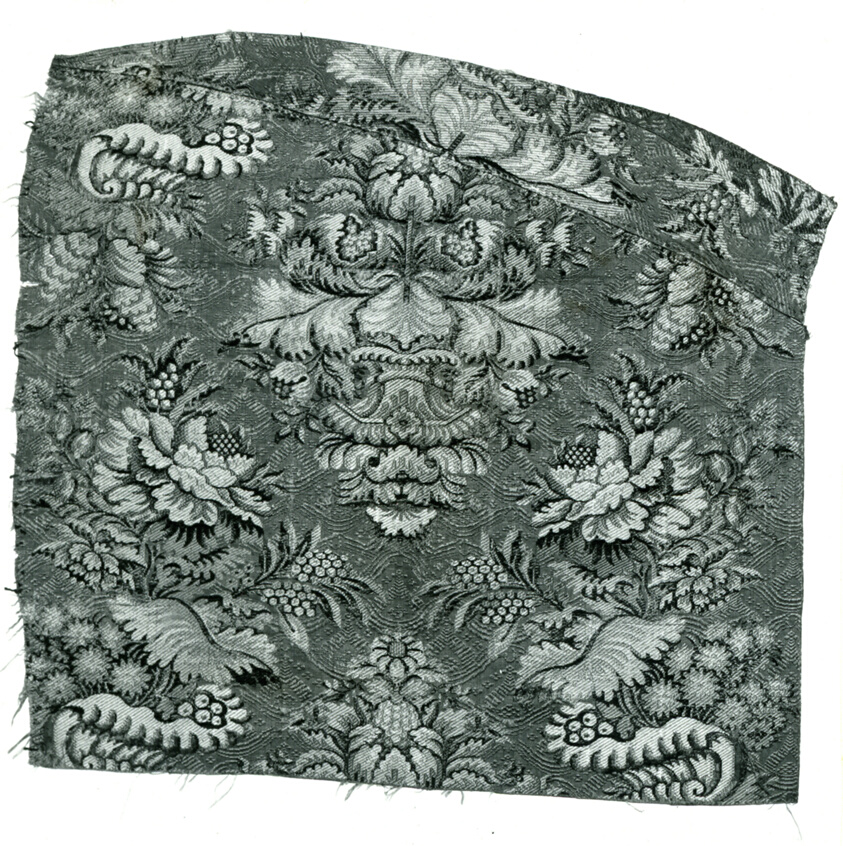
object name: Textile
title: Fragment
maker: France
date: Mid–18th century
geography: France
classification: textile; weaving